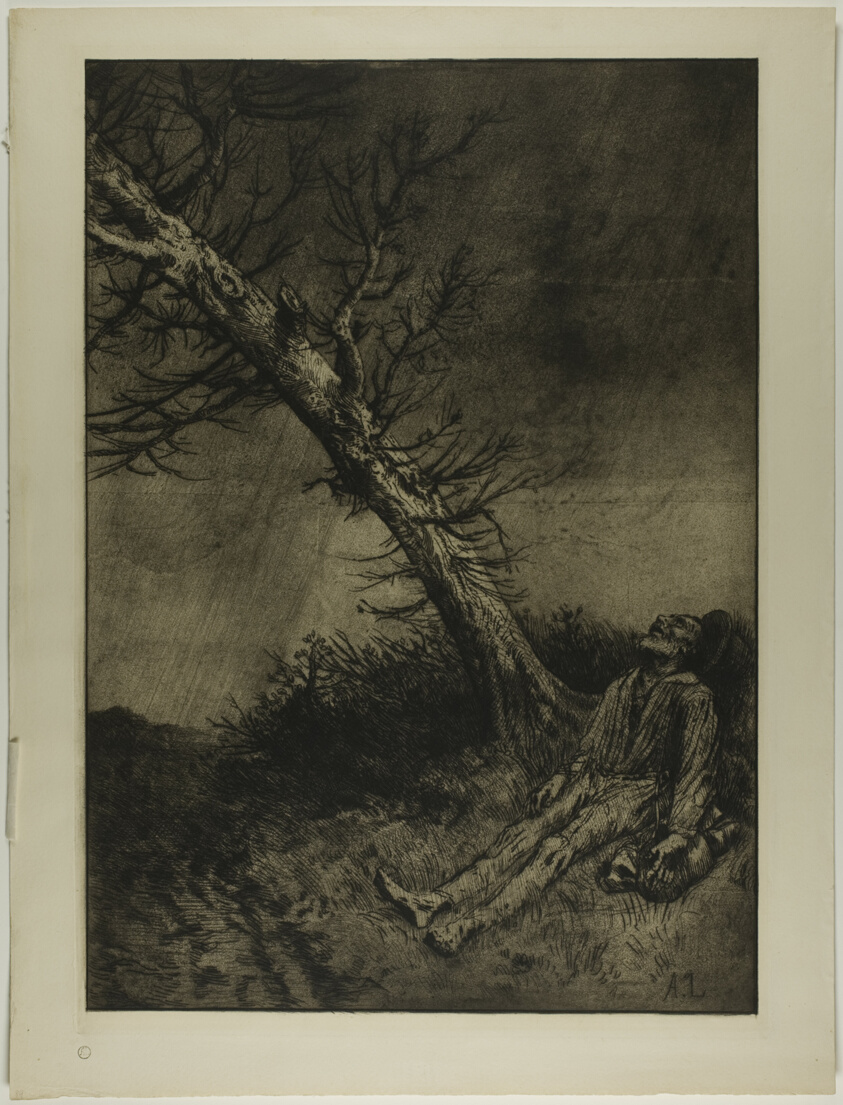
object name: Print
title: The Death of the Vagabond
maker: Alphonse Legros (French, 1837-1911)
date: 1855–77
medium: Etching, aquatint and drypoint on cream wove paper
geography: France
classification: etching; print; prints and drawing